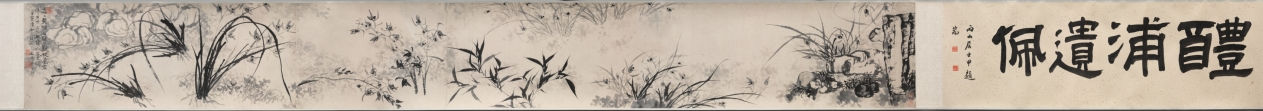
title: Rocks, Orchid, and Bamboo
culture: China, Qing dynasty (1644-1911)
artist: Shitao (Chinese, 1642–1707)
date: 1662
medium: handscroll; ink on paper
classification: Painting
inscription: Title colophon in four characters with signature and two seals on gold-flecked paper.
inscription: Artist's signature, inscription (with date of 1662), five seals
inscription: Colophon with two seals.